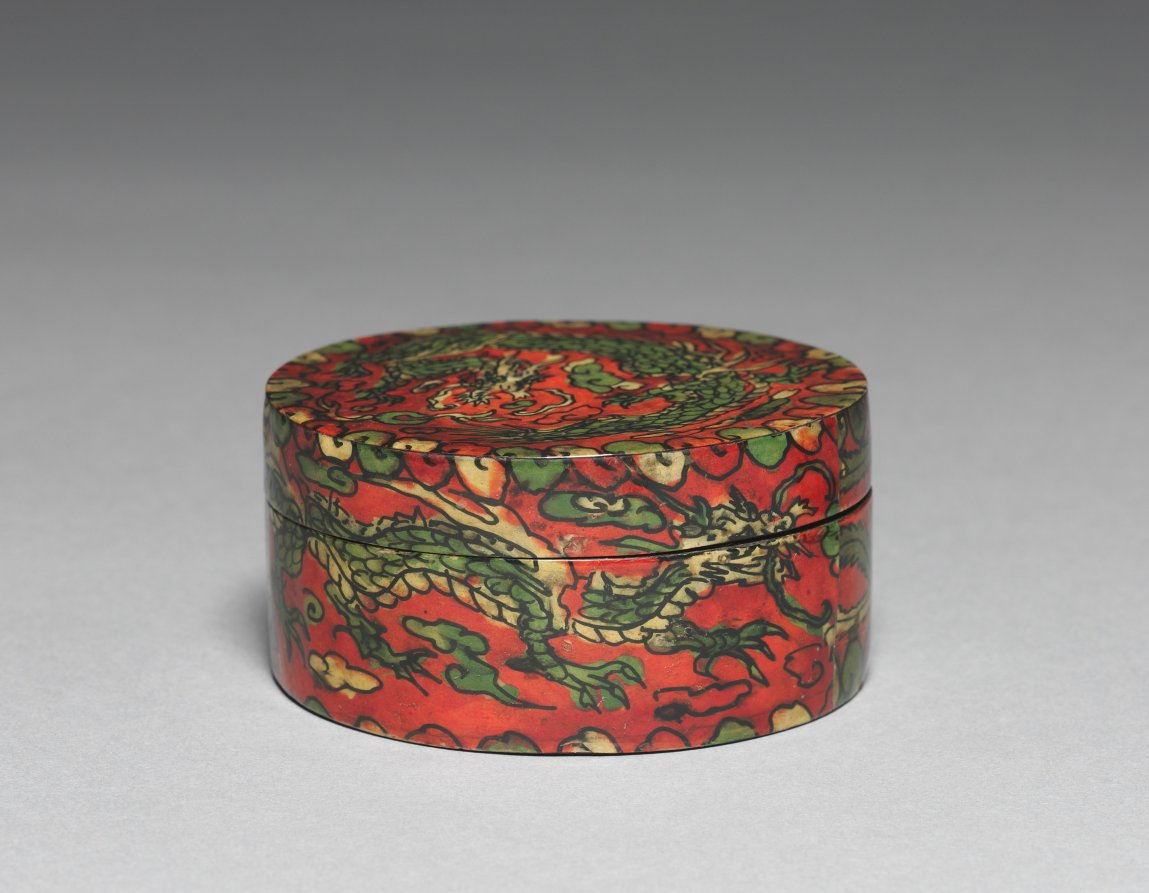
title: Incense Box with Dragon Design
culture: Korea, Joseon dynasty (1392–1910)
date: 1900s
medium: Painted wood with flattened ox-horn inlay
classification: Miscellaneous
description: This incense box is colorfully decorated with the technique of oxhorn plating. The oxhorn was cut, soaked in water, boiled, and then pressed into thin translucent sheets. Since oxhorns are usually rather small, dozens of them were required to fully decorate even a small wooden object. The lid of this container is colorfully illustrated with the imagery of a dragon amid clouds deemed as an auspicious symbol, and its side presents flying dragon and phoenix following one after another.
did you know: This box is made of small flattened pieces of oxhorn. Since oxhorn is rather small, possibly dozens of them were used to fully decorate even a small wooden object like this box.